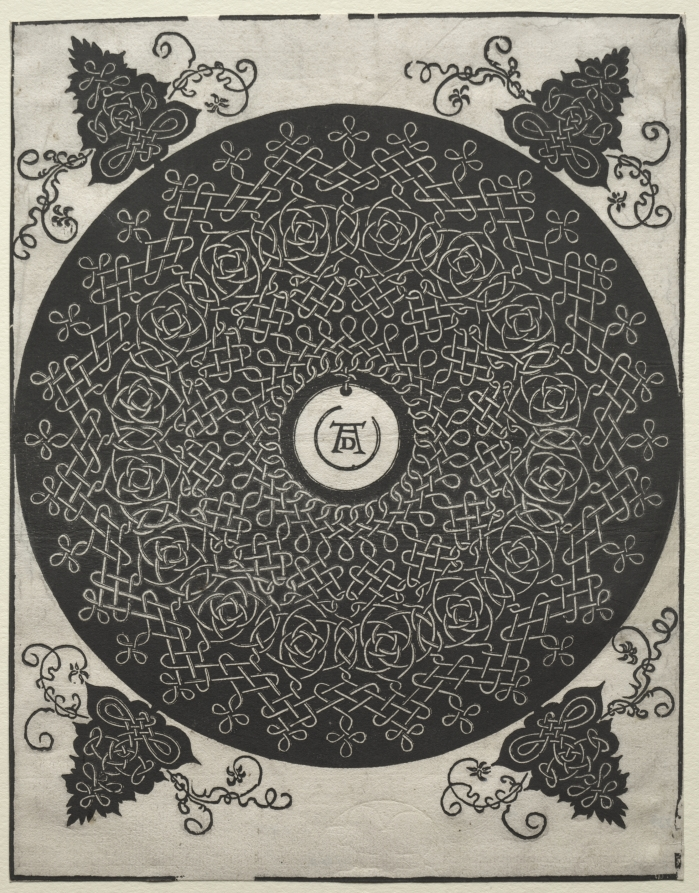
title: Third Knot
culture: Germany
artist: Albrecht Dürer (German, 1471–1528)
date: c. 1506–7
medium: woodcut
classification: Print